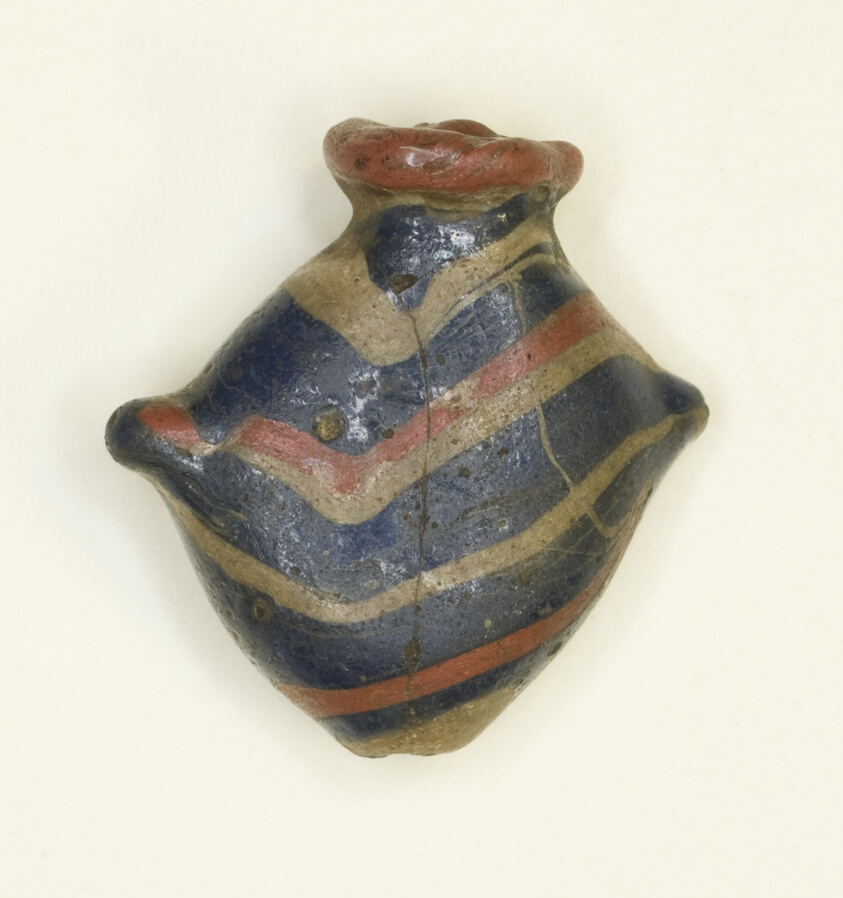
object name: Costume and Accessories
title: Amulet of a Heart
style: eighteenth dynasty, new kingdom, egyptian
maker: Egyptian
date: New Kingdom, Dynasty 18 (about 1350 BCE)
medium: Glass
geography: Egypt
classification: amulet; jewelry; ancient art; bead; costume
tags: anatomy, heart shape